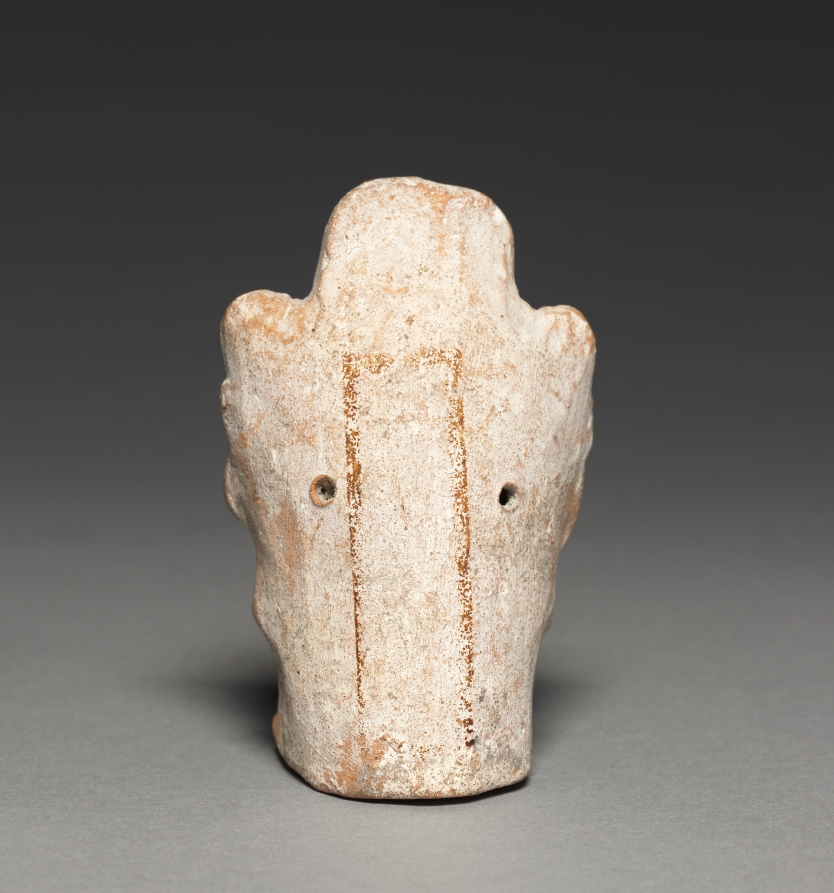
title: Female Figurine Rattle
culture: Mexico, Campeche, Jaina Island, Maya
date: 600–900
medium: Ceramic, pigment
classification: Sculpture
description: This hollow, mold-made figurine contains pellets that transform it into a rattle used as a musical instrument, perhaps during household rituals.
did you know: This hollow, mold-made figurine contains pellets that transform it into a rattle.